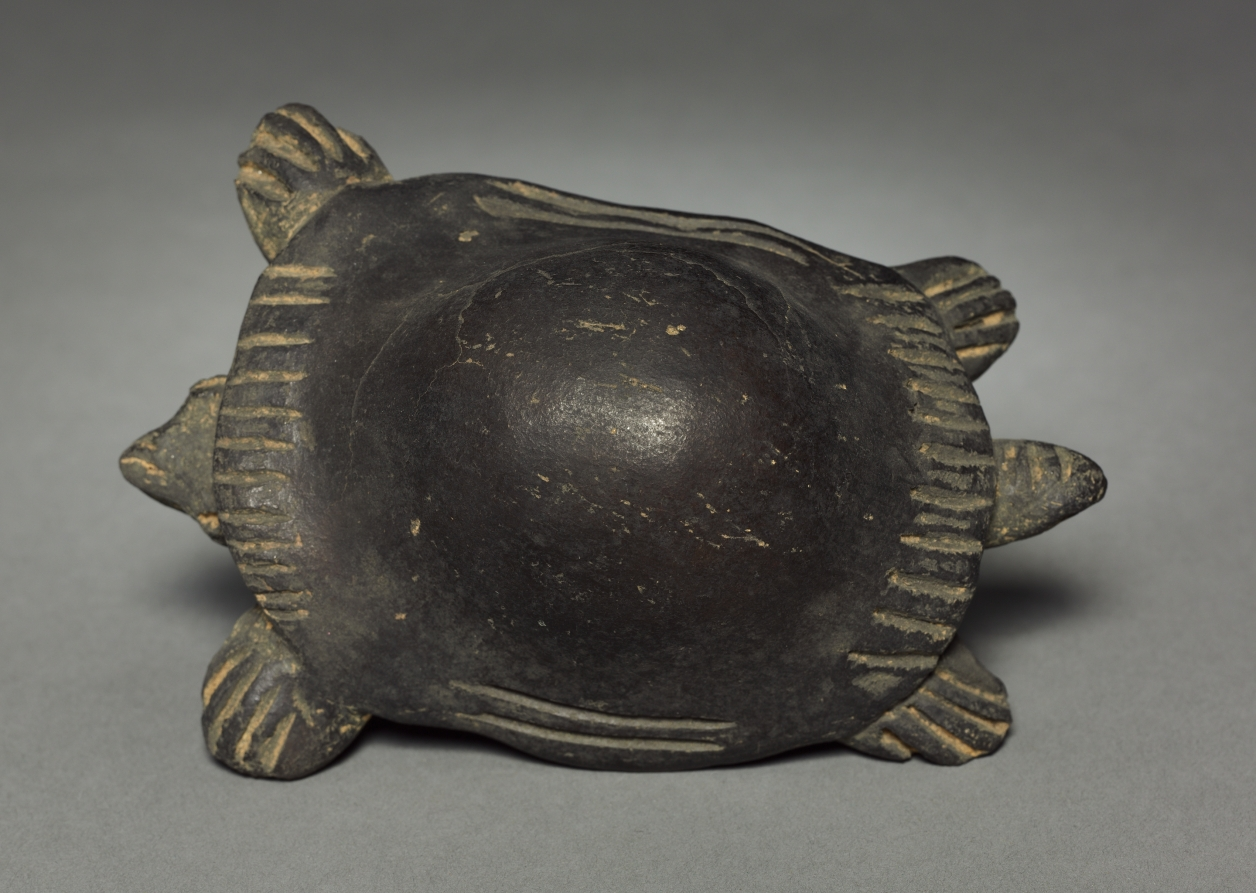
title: Turtle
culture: Colombia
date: before 1921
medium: pottery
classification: Ceramic